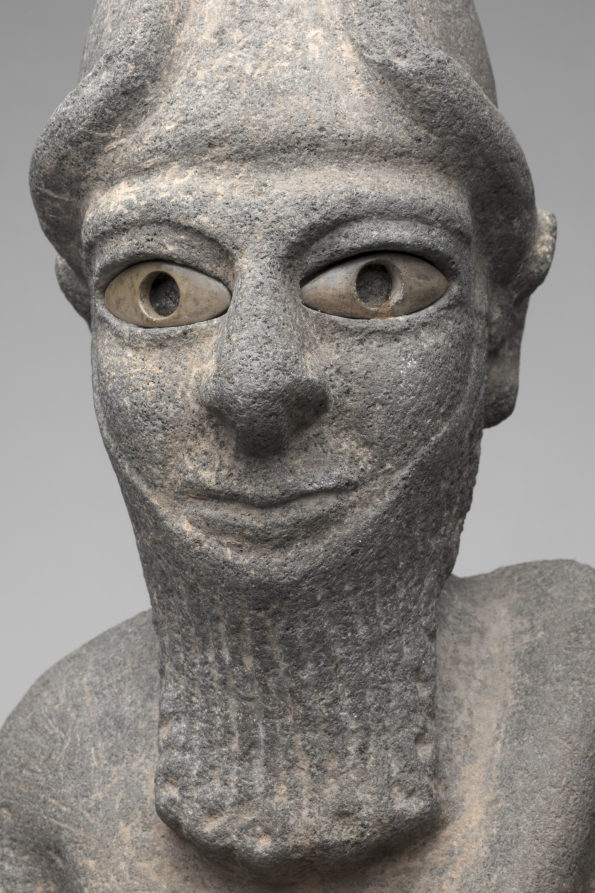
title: Priest-King or Deity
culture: Hittite, North Syria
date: c. 1600 BCE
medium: basalt with bone eyes (left, ancient; right, restored)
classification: Sculpture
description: The Hittites migrated into Anatolia in the 3rd millennium BCE and spoke an Indo-European language, a group that includes Greek, Latin, Persian, Sanskrit, English, and most modern European languages. They were the first ancient people to use iron for weapons. From about 1600–1200 BCE their empire was at its peak, extending from central Anatolia to Syria, and south along the eastern Mediterranean. Their vast empire and interest in commerce enabled the Hittites to spread Mesopotamian ideas and culture throughout the ancient Mediterranean world. This large basalt sculpture is exceptionally rare in depicting a Hittite god or priest-king wearing a horned conical crown, false beard, and long robe. He holds a bowl in his right hand and once held something in his left, perhaps a staff or sword.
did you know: The left eye of the sculpture is the original bone inlay while the right eye is a modern restoration done after the piece was damaged.